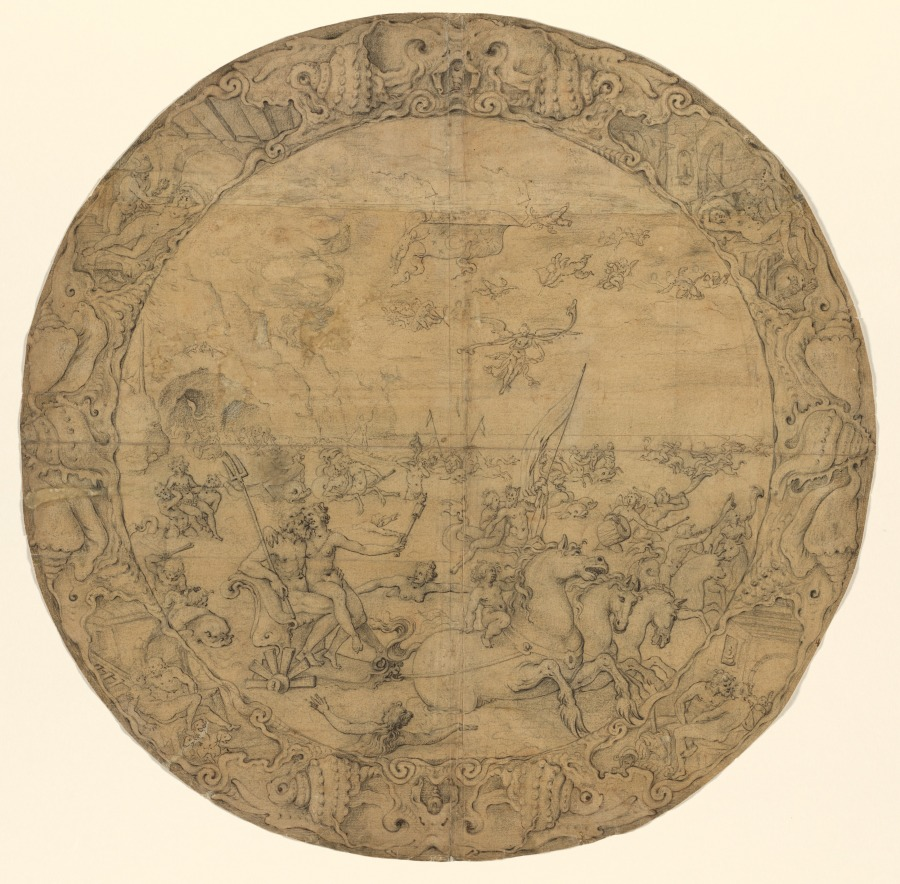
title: Design for a Standing Dish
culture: Netherlands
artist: workshop of Adam van Vianen (Dutch, 1559–1627)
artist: or Christiaen van Vianen (Dutch, c. 1600–1667)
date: c. 1625–45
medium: black chalk (stumped in places), pen and brown ink, and brush and black ink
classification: Drawing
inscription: VERSO OF SECONDARY SUPPORT, center left, in graphite: [2?] ; center right, in graphite: [illegible]ave / Natt[illegible] F[illegible]